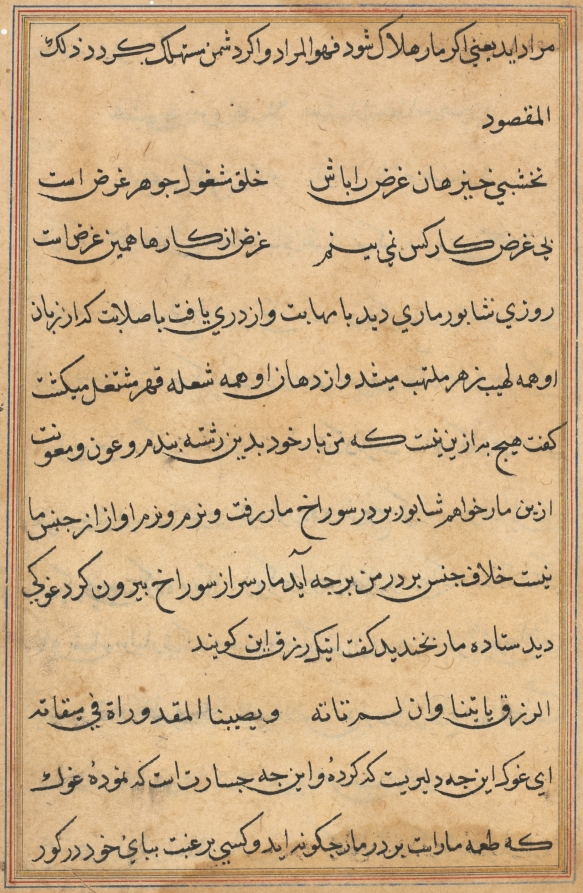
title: Page from Tales of a Parrot (Tuti-nama): text page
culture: Mughal India, court of Akbar (reigned 1556–1605)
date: c. 1560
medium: gum tempera, ink, and gold on paper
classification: Painting